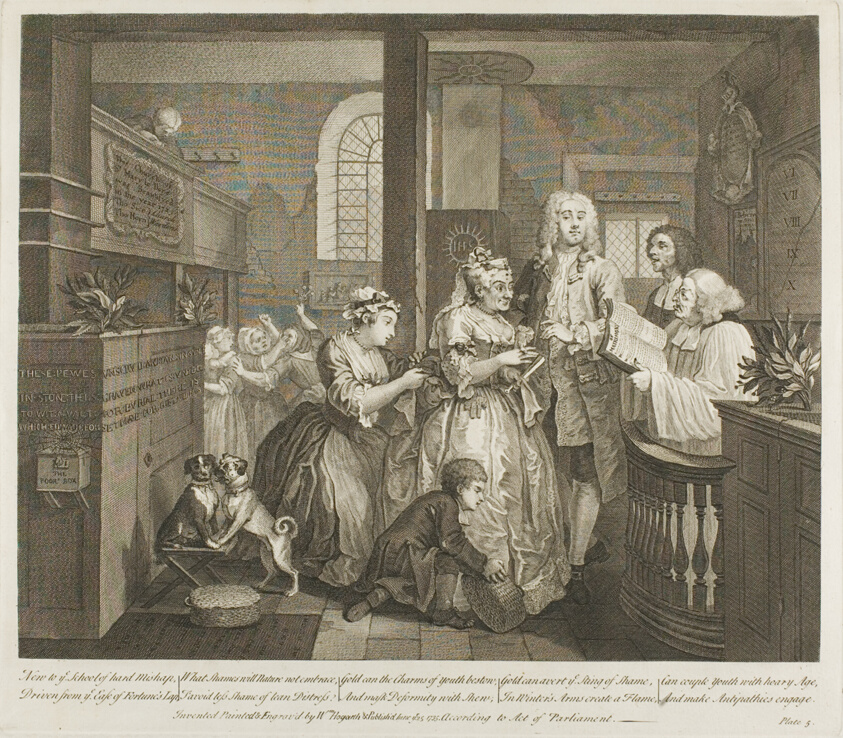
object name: Print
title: Plate Five, from A Rake's Progress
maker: William Hogarth (English, 1697-1764)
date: June 1735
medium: Etching and engraving in black on ivory laid paper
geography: England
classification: etching; print; prints and drawing